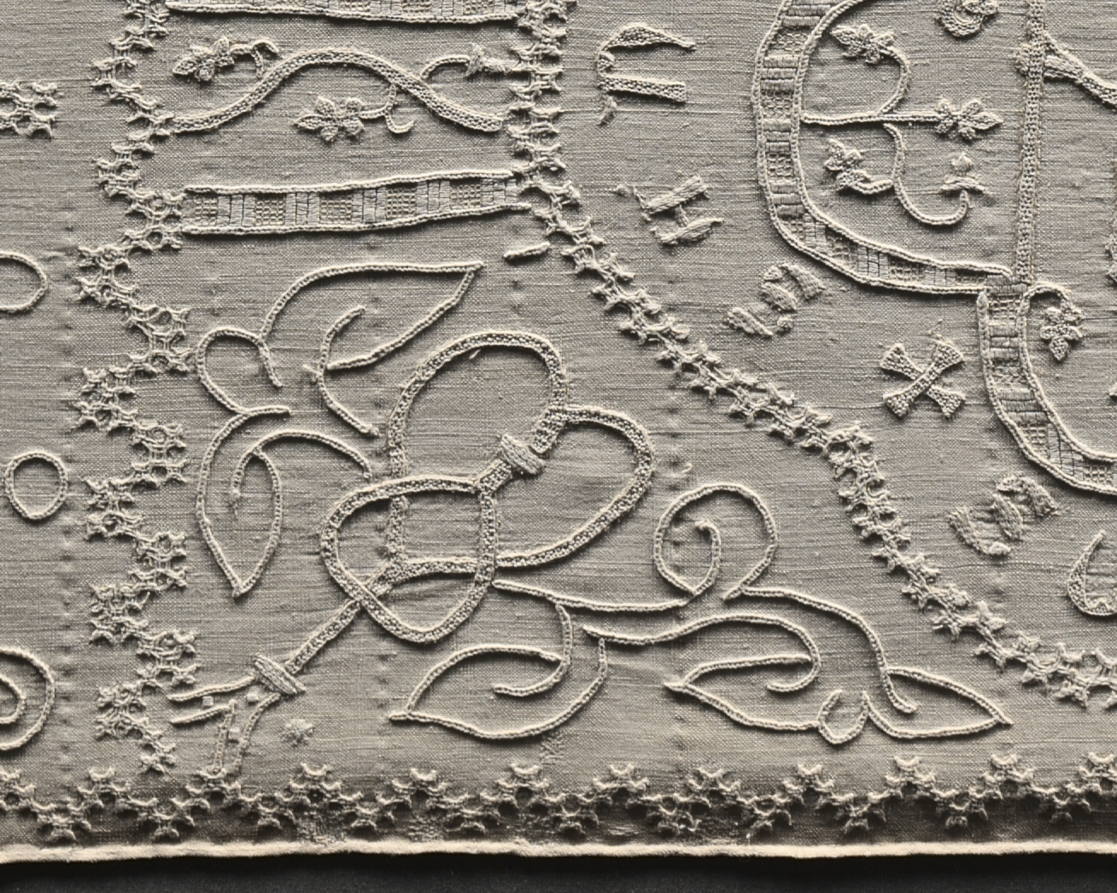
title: Altar Cloth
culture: Germany, Altenberg on the Lahn, Premonstratensian Convent, 14th century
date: c. 1350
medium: embroidery: linen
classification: Embroidery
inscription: various motifs enclosed in quatrefoils with identifying inscriptions in Gothic letters.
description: This large, embroidered altar cloth is one of the rarest, most important medieval church furnishings in existence. It was stitched by nuns in the Premonstratensian Convent in Altenberg on the Lahn River, north of Frankfurt, Germany, and was used to cover the church’s high altar in the weeks leading up to Easter. The cloth is an example of linen embroidery, a specialty of German nuns in the later Middle Ages. The Altenberg monastery church once had valuable furnishings; the high altar retable (a decorated frame with sculptures and paintings on the top of an altar) has survived, the main parts of which are now in the Städel Museum in Frankfurt, Germany.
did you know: When lit from behind, the previously hidden details emerge and the complex design becomes evident.